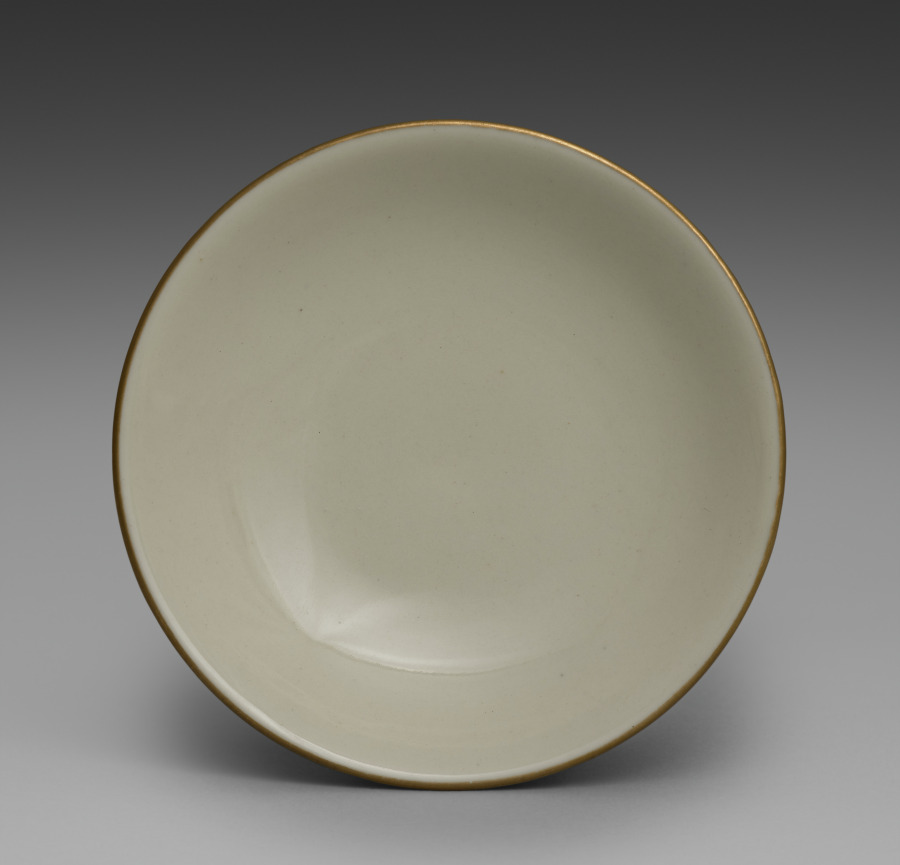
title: Cover for a Bowl from Dining Set with Plum Blossoms and Cracked-Ice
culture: Japan, Meiji period (1868–1912)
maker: Seifū Yohei II (Japanese, 1844–1878)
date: c. 1875–78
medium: Porcelain with molded designs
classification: Ceramic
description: Each item in this set has a delicate low-relief design of flowering plum branches over scattered, intersecting lines meant to resemble the cracked-ice surface of a frozen body of water and is signed on the base in gold pigment. While Yohei II produced many fine works in underglaze blue, like those produced by Kiyomizu Shichibei, he also made works in quite different styles later in his career, from the early 1870 s. In 1873, he was appointed purveyor to the Industrial Center of Kyoto Prefecture, a designation associated with Kyoto’s efforts to reach an international market through the port of Kobe; and from 1875 until his death, he was involved in national-level projects to present Japanese ceramics across the world. It was during this period that Yohei III was apprenticed to Yohei II, and it has been suggested that this set may in fact be an early example of Yohei III’s work, which he signed with his teacher’s name. Decorated with flowers resembling Japanese textile motifs, the set calls to mind the design of Yohei II’s pair of vases with plum blossoms in the Victoria and Albert Museum. Here, the elaborate trees created for a formal public exhibition setting have been translated into the approachable blossoms of the genteel domestic environment. While the designs are consistent across the pieces, each raised flower petal and pistil and each incised line in the ice was done by hand, so the cups, bowls, and dishes are similar yet unique. The bottoms of two boxes once identified the set’s owner, but the information has been deliberately obscured with black ink. However, inscriptions still visible appear to indicate two occasions, once at the end of July 1886 , and once again in June 1916 , when parts of the set were requested from Hokura in Niigata Prefecture. The location corresponds to a neighborhood in the present-day city of Jōetsu. The surname Tsuji 辻 also appears on a paper tag affixed to one of the box cloths. Future research may possibly reveal more about their provenance. A vase by Yohei III in a private collection combines the formal grandeur of the Yohei II vases in the Victoria and Albert Museum with the gentler design of this dining set, placing flowering plum trees against soft, scalloped-edge clouds resembling those in golden screens.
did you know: The dining wares have a creamy white coloration that the four boxes containing them identify as Korean in style.